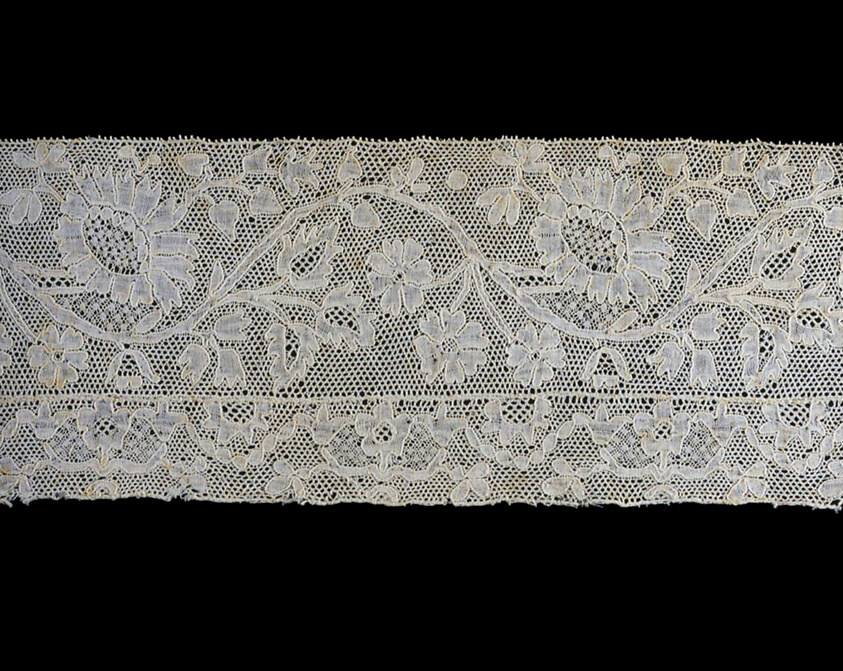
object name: Textile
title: Border (Fragment)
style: 18th Century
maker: Belgium, Flanders, probably Antwerp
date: 1750/1800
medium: Cotton, bobbin straight lace of a type known as "Mechlin" with a kat stitch mesh ground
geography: Flanders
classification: lace - bobbin; lace; textile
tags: sunflowers, flowers, floral motifs, foliage